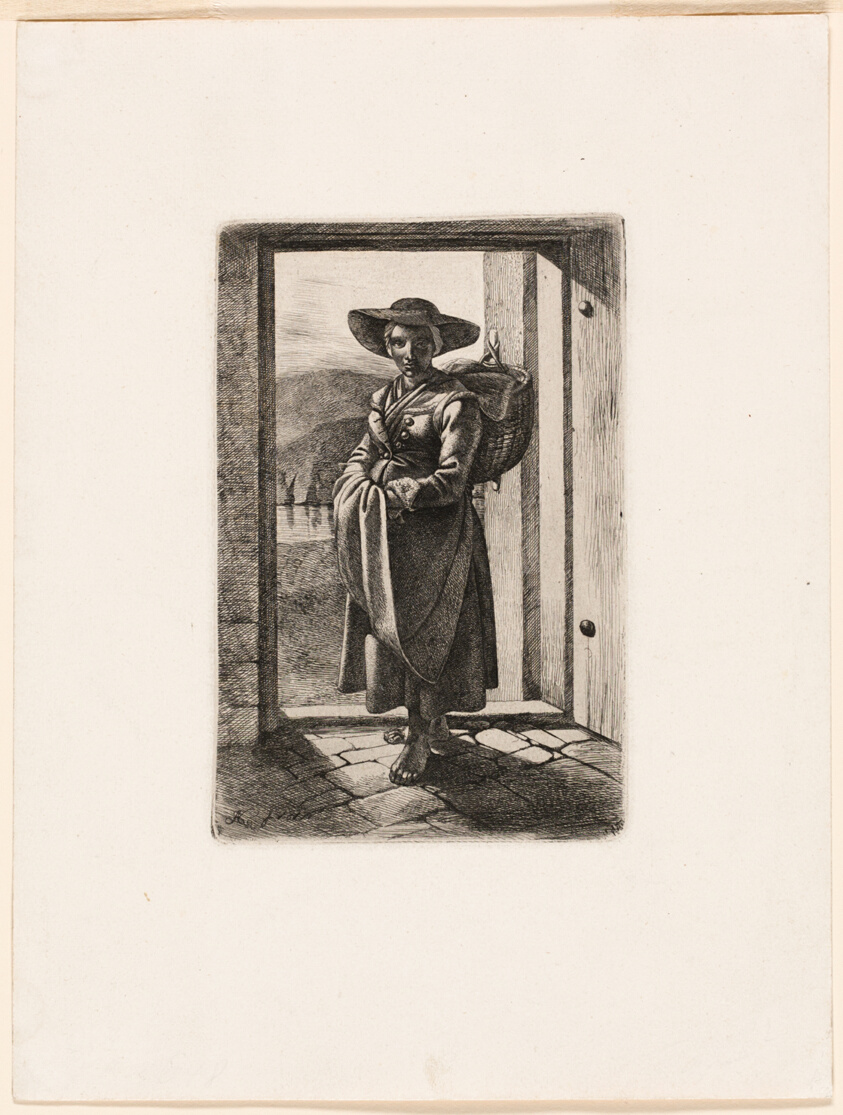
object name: Print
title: The Hungarian Woman Standing in the Door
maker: Johann Adam Klein (German, 1792-1875)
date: 1817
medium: Etching in black on ivory wove paper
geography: Germany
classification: etching; print; prints and drawing